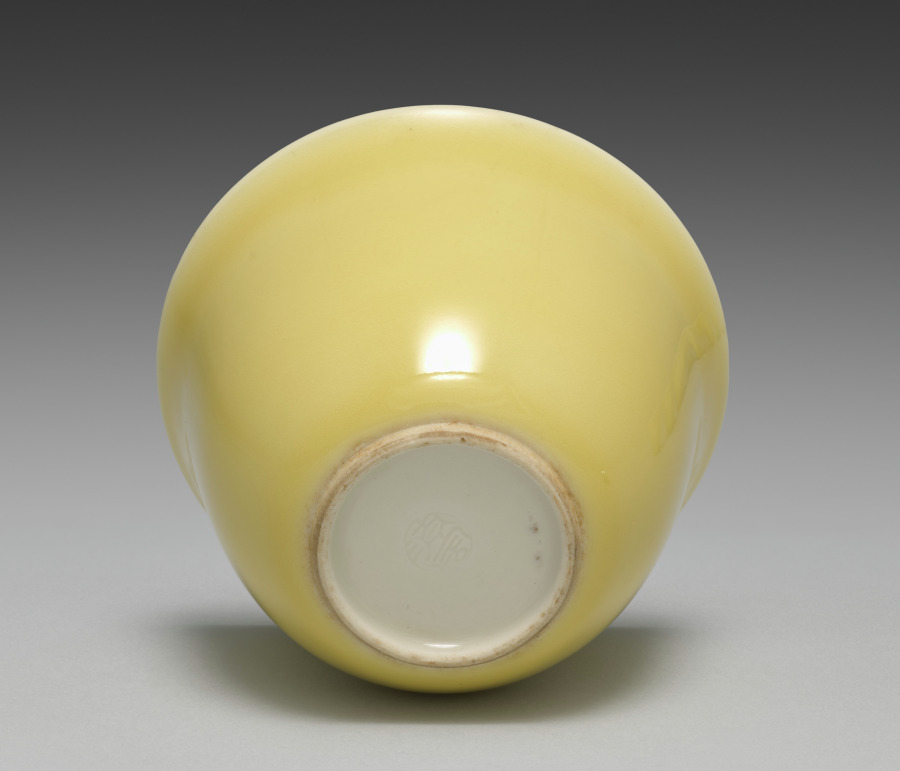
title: Cup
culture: Japan, Taishō period (1912–26) or Shōwa period (1926–89)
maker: Seifū Yohei IV (Japanese, 1872–1951)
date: 1914–46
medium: porcelain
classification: Ceramic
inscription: 清風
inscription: 清風造 【印】成山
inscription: 清風盧人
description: Like his father, Yohei IV also produced works with red or yellow monochrome glazes. His yellow-glazed works include this set of five drinking cups, a pair of sake pourers CMA 2022.216, and a sweets bowl molded into the shape of a chrysanthemum CMA 2022.218.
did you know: Seifū Yohei IV learned the ceramics industry from his father and painting from Tanomura Shosai.